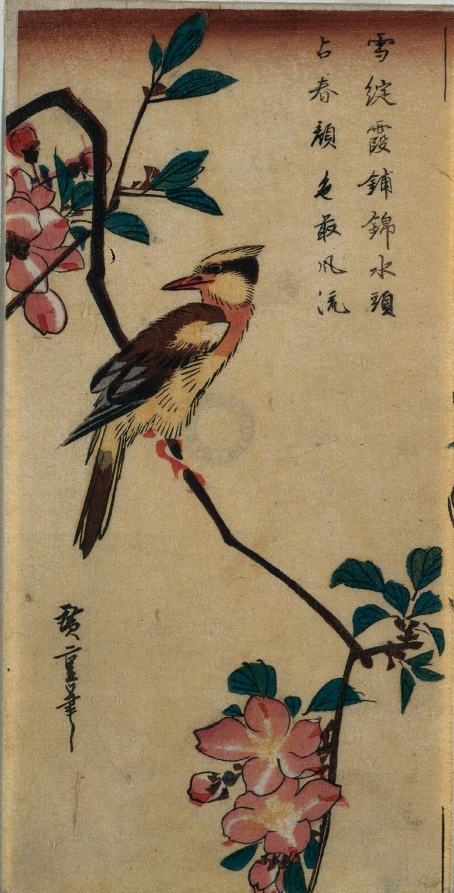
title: Black-Naped Oriole (Korean Warbler) on a Hall Crabapple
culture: Japan, Edo period (1615–1868)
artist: Utagawa Hiroshige (Japanese, 1797–1858)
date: 1832–35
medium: color woodblock print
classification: Print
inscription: Signature: Hiroshige hitsu